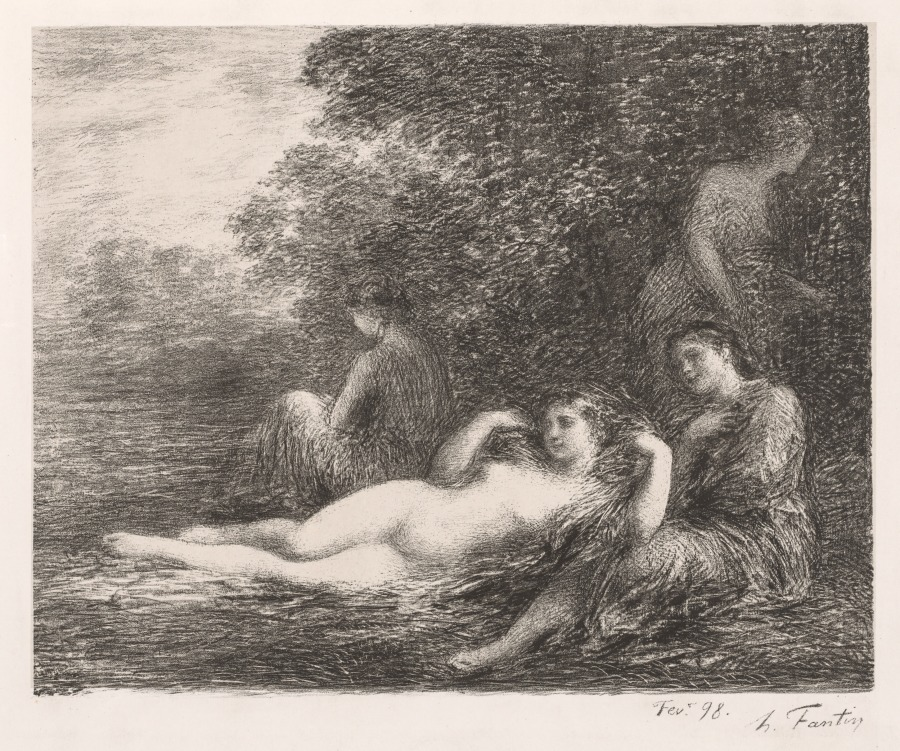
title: The Bathers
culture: France, 19th century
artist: Henri Fantin-Latour (French, 1836–1904)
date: 1898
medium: lithograph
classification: Print